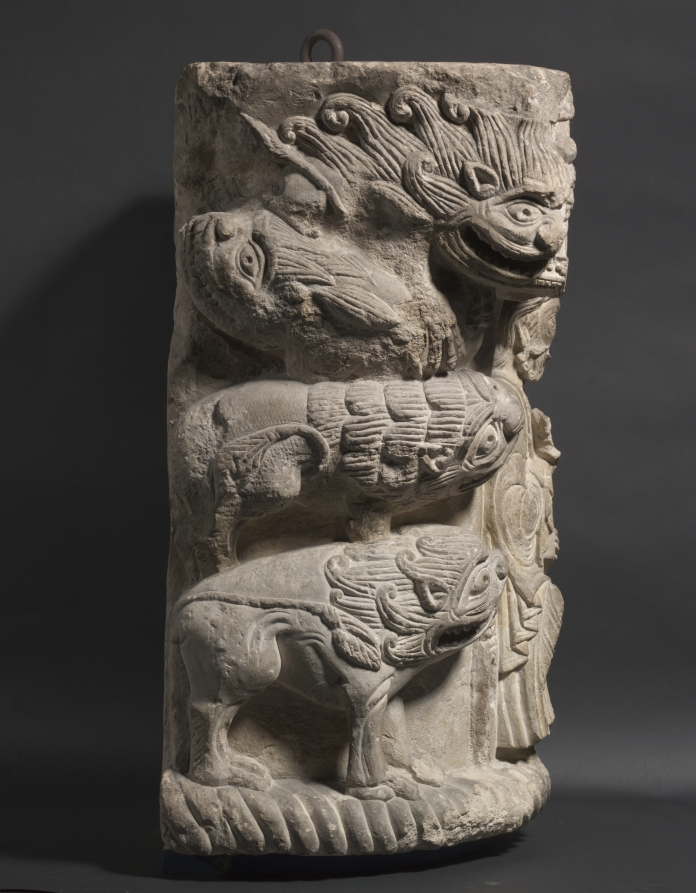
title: Daniel in the Lion's Den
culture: France, Saint-Aignan-sur-Cher, 12th century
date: c. 1125–50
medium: limestone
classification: Sculpture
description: According to the Old Testament, Daniel was cast into a lion’s den as punishment for his belief in a single god, but he was miraculously delivered from harm on account of his faith. This story is related here, with Daniel flanked by lions and the angel sent by God to save him. Together with other decorated capitals, this imposing work of Romanesque sculpture once decorated the interior of the church of Saint-Aignan-sur-Cher, a city in central France.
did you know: During the 12th century, churches used images to teach the faithful who were illiterate. While Daniel lived before Jesus, he is depicted holding a bible, alluding to the continuity between the Old and New Testaments.